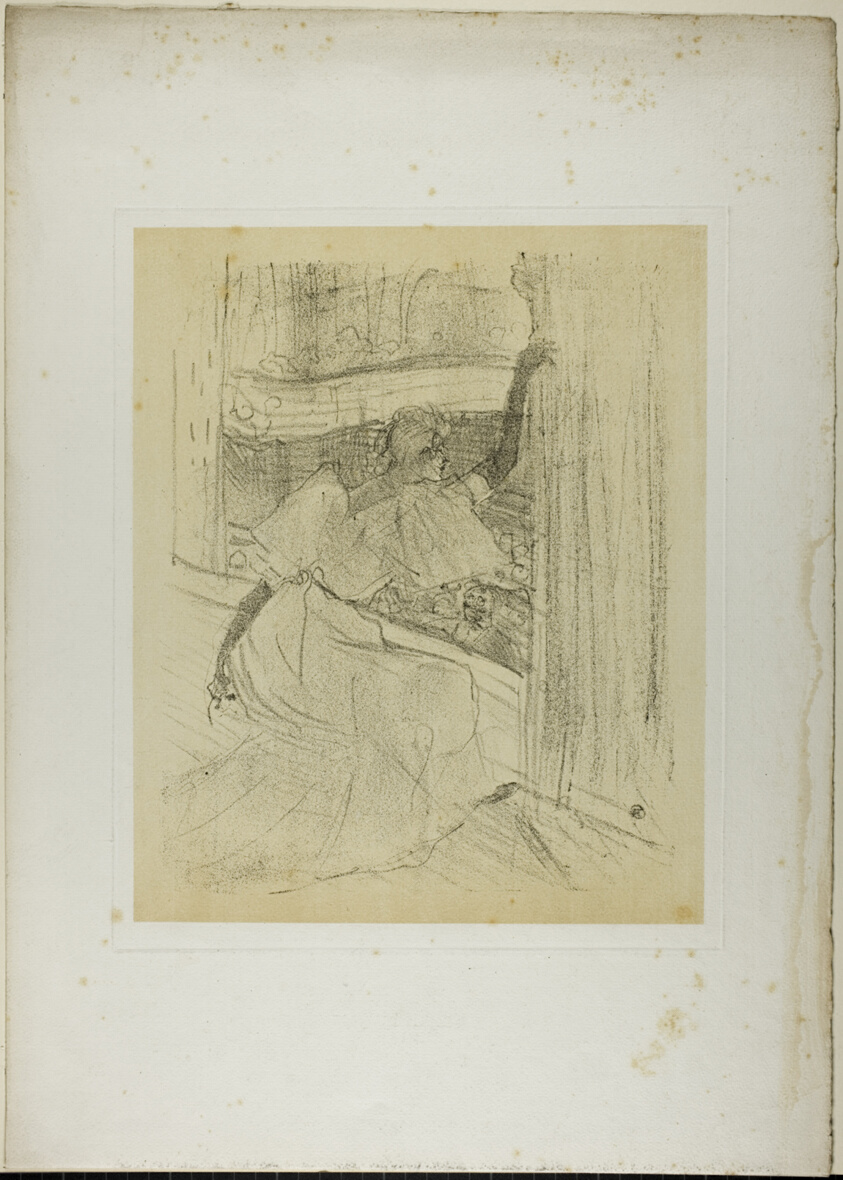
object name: Print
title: Yvette Guilbert Taking a Bow, from Yvette Guilbert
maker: Henri de Toulouse-Lautrec (French, 1864-1901)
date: 1898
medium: Lithograph with beige tint stone, on ivory laid paper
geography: France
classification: lithograph; print; prints and drawing